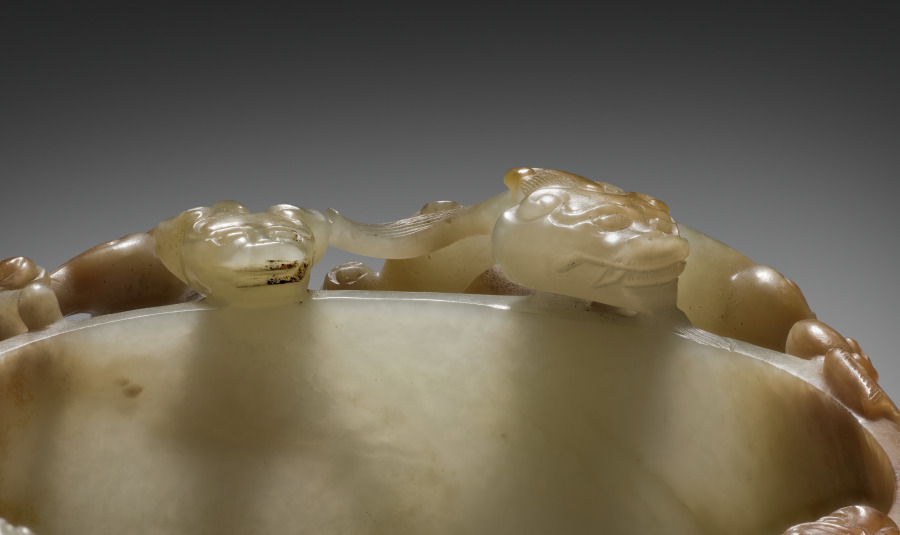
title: Cup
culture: China, Qing dynasty (1644–1911), Qianlong reign (1736–95)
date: 1736–95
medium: jade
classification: Jade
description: In the Qing dynasty, luxury items became more affordable to larger parts of the society, including women, merchants, and literati in nonofficial positions. Imperial patronage and a growing urban population also encouraged consumption of luxury goods and local craftmanship. This cup with open-work interlacing dragons shows the creative mind of the skilled artisan who carved it from a round piece of jade.